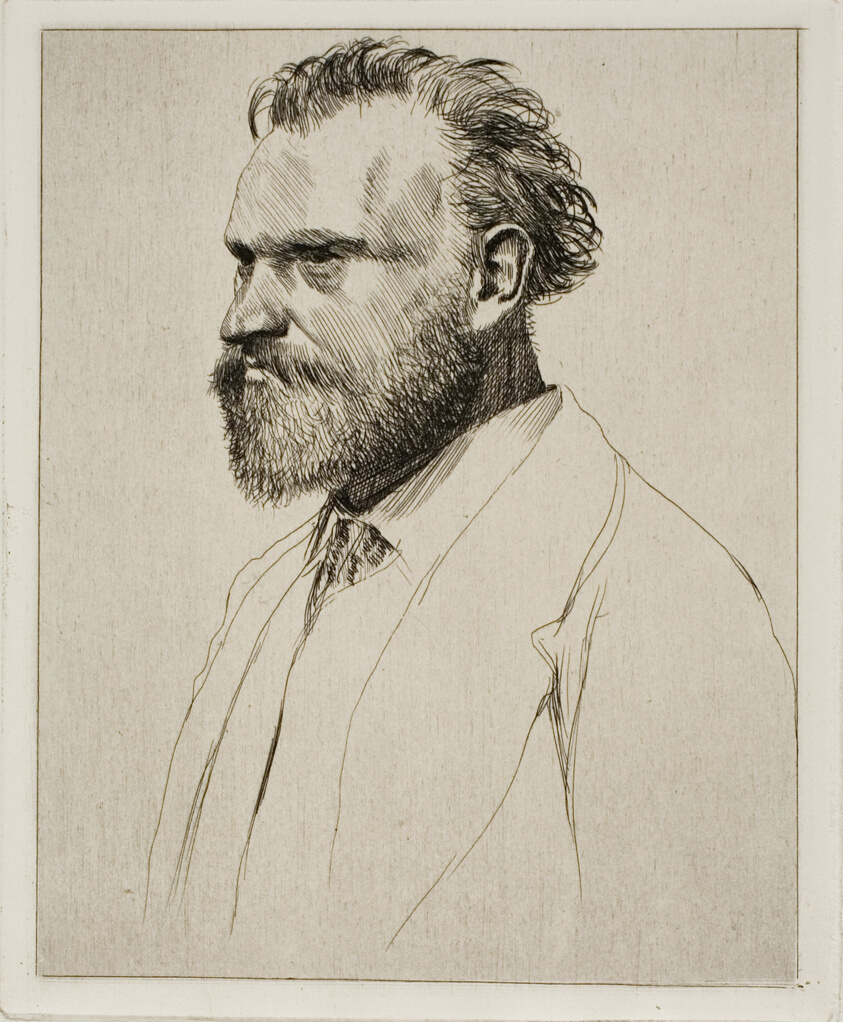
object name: Print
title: Edouard Manet, Bust-Length Portrait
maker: Edgar Degas; French, 1834-1917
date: 1864–65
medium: Etching, drypoint and aquatint on white wove paper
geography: France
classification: etching; print; prints and drawing; paper